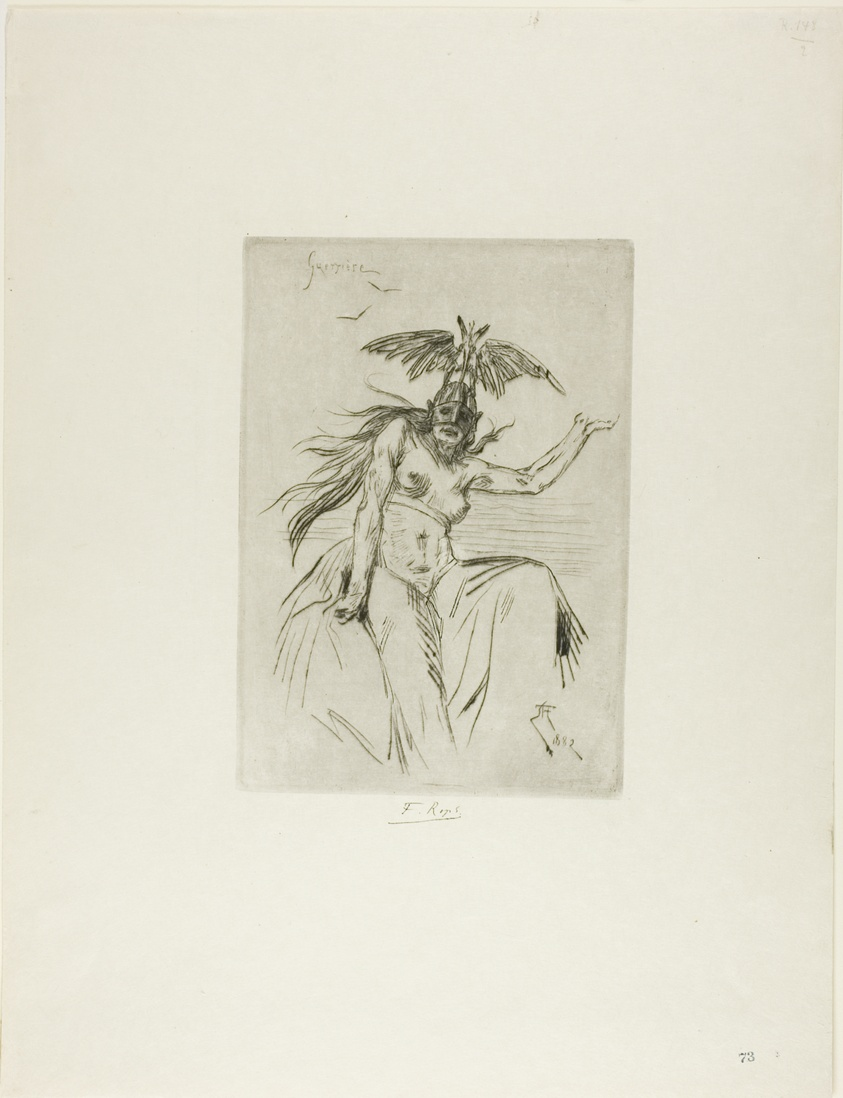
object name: Print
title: Warrior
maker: Félicien Rops (Belgian, 1833-1898)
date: 1882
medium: Heliogravure, with drypoint and aquatint, on ivory wove paper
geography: Belgium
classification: photogravure; print; prints and drawing